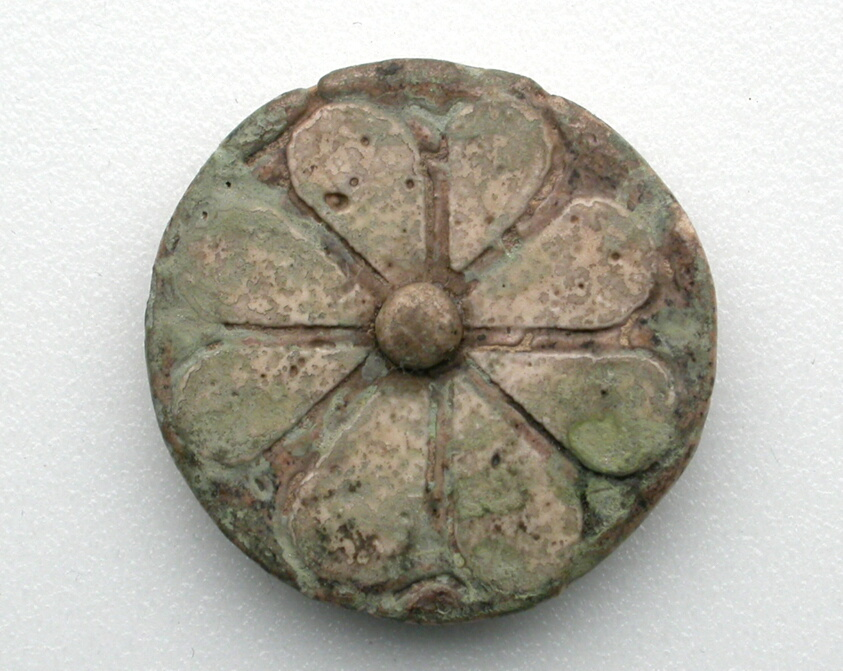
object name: Decorative Arts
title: Rosette from the Temple of Ramesses III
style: new kingdom, egyptian, ancient, twentieth dynasty, ramesside period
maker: Egyptian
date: New Kingdom, Dynasty 20 (about 1186–1069 BCE)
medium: Faience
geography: Egypt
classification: inlay; ceramics; ancient art; decorative arts; faïence (composite material)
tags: flowers